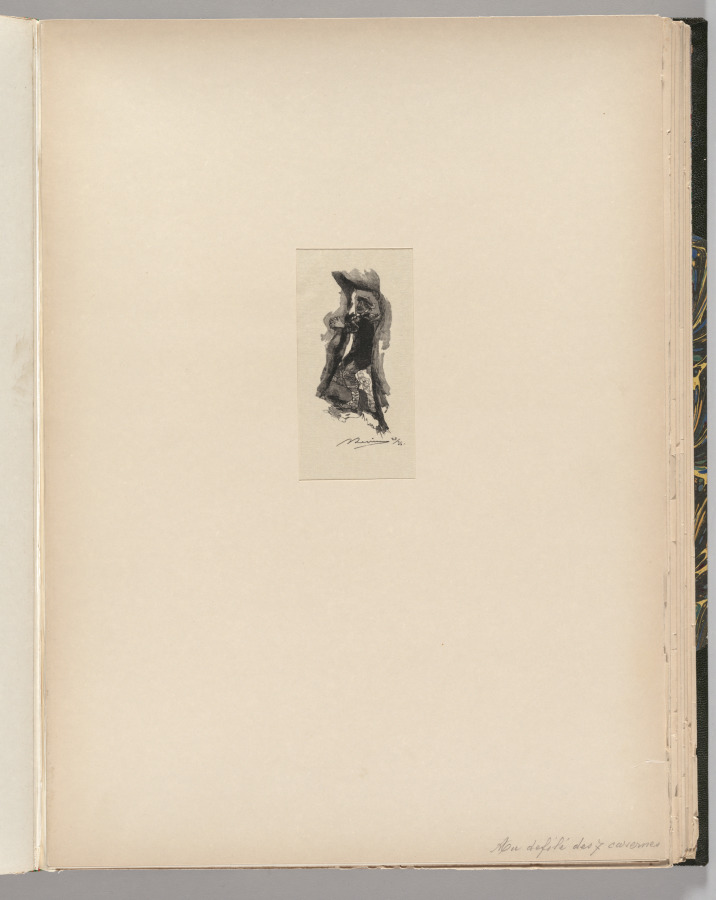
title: Fontainebleau Forest: Pass of the Seven Caverns (La Forêt de Fontainebleau: Au défilé de Sept-Cavernes)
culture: France, 19th century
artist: Auguste Louis Lepère (French, 1849–1918)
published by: A. Desmoulins, Published in Revue Illustrée, 1887–90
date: 1890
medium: wood engraving from bound volume of 34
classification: Bound Volume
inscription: On block, lower right: ALEPERE.; below image, lower right, in black ink: ALepère 22/35; on nwindow mat, lower right, in graphite: Au défilé des 7 Cavernes